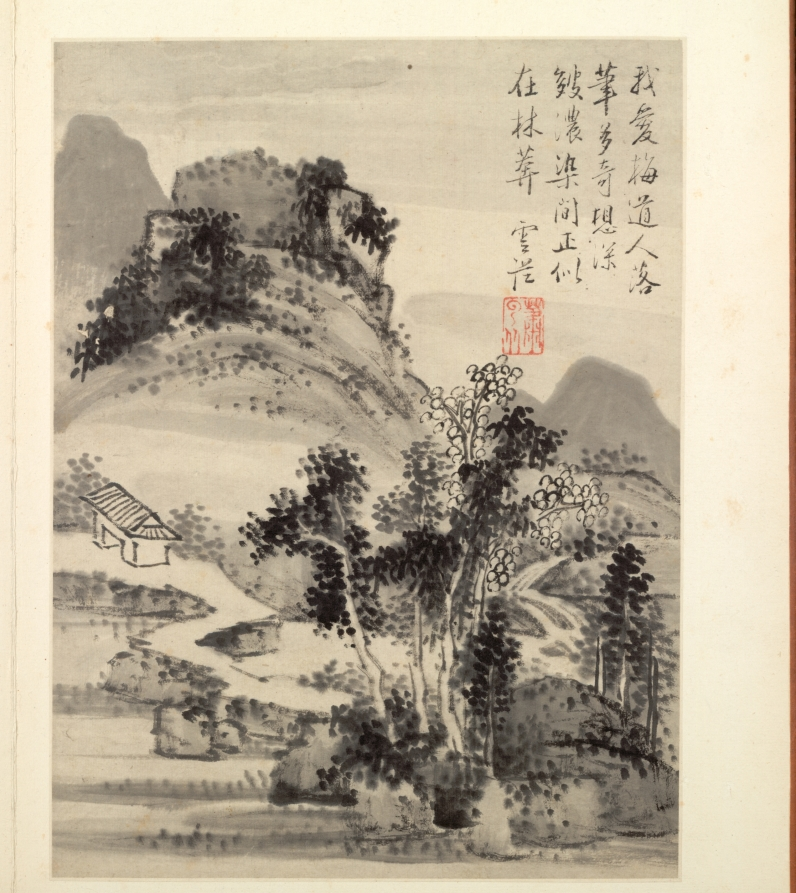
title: Album of Seasonal Landscapes, Leaf D (previous leaf 2)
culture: China, Qing dynasty (1644-1911)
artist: Xiao Yuncong (Chinese, 1596–1673)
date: 1668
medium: album leaf; ink and light color on paper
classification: Painting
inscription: 我愛梅道人，落筆多奇想。 深皴濃染間，正似在林莽。 雲從 [印]蕭雲從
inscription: 9 additional seals: 2 of Chen Yixi 陳奕禧 (1646-1709); 4 of Li Yufen 李玉棻 [Li Yunhu 李韵湖] (active mid-1800s); 3 unidentified.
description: Throughout his lifetime, Xiao Yuncong visited Nanjing and Yangzhou, cities embedded in the fertile and water-rich Jiangnan region, as reflected in his paintings. Xiao painted from nature, and his landscapes are informed by the seasons and his travels, as well as by his experience as a print designer. Xiao’s fresh, light colors continue to appear in later Shanghai school paintings. This album was formerly in the collection of Li Yufen in Yangzhou and then owned by Wu Hufan in Shanghai. While the artist impressed his seal consistently below his poetic inscriptions in the upper parts of the composition, the red seals on the margins and in the lower corners of the paintings are impressions by the album’s previous owners.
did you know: Xiao Yuncong evoked dark, stormy summer weather with rich tones of ink.